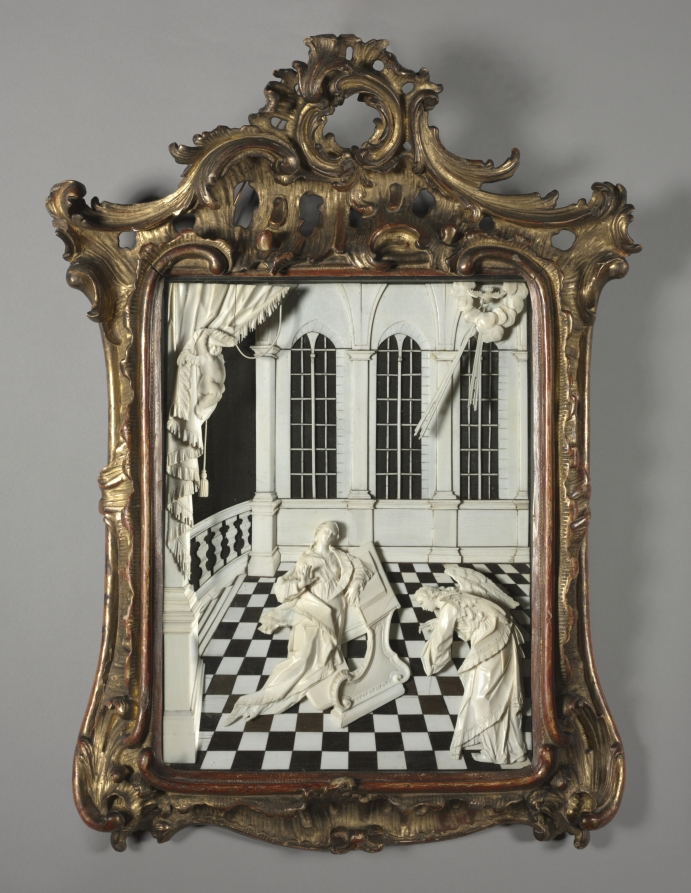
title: The Annunciation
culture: Germany, 18th century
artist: Johann Michael Düchert (German, 1725–1799)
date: 1750s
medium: ivory, ebony, velvet, in the original gilded and glazed frame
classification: Sculpture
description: This object entered the collection attributed to the German sculptor Johann Paul Egell. However, this attribution never sat comfortably because Egell mostly worked on large-scale commissions in stone, stucco, and wood, rather than with these more precious materials. Recent research indicates that the work is by Düchert, one of Egell's most gifted students, who translated Egell's distinct visual language—the elongated figures, tiny heads, unusually flattened space, and planar handling of drapery—into small-scale ivories.